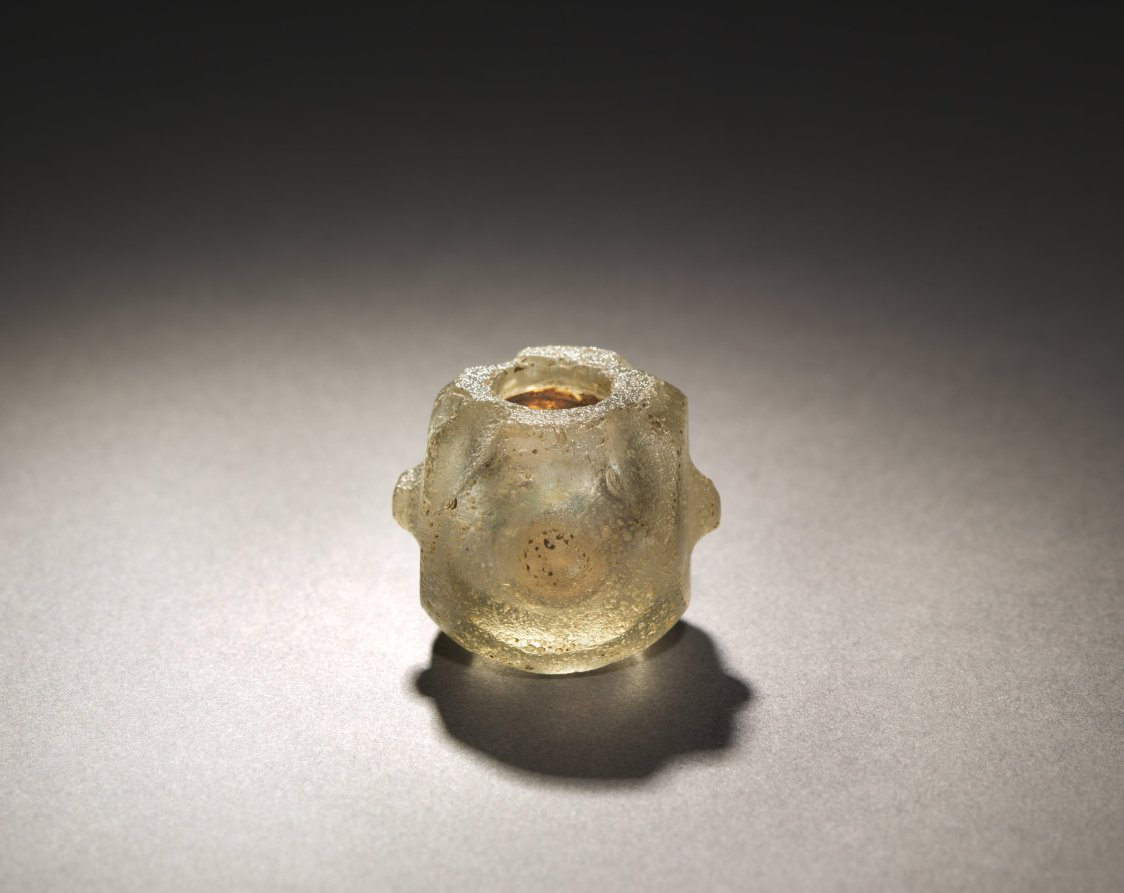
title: Miniature Reliquary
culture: Afghanistan, probably Begram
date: c. 1–200 CE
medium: glass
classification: Glass